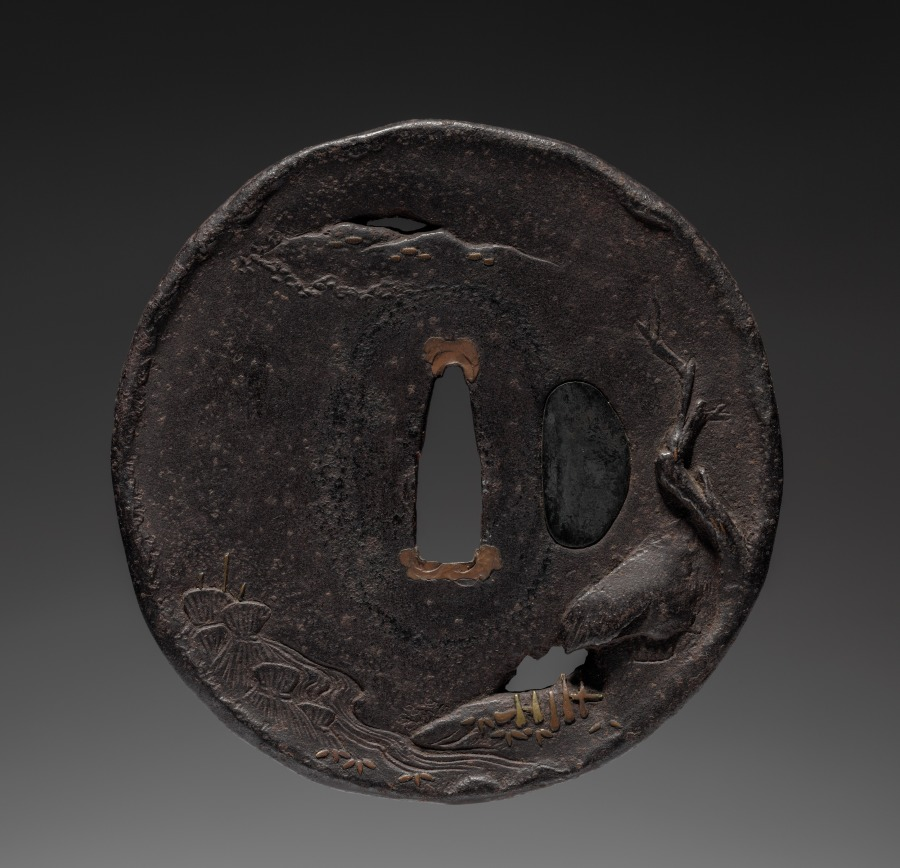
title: Sword Guard (Tsuba) with House and Rice Harvest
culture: Japan, possibly Edo period (1615-1868)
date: c. 1615–1868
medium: iron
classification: Arms and Armor